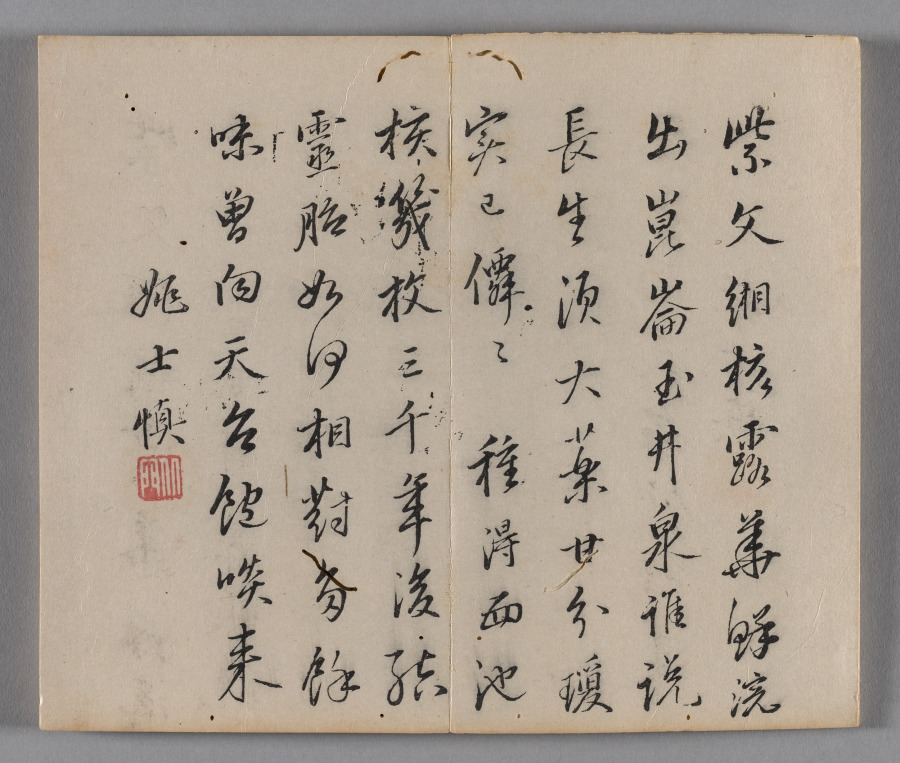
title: Ten Bamboo Studio Painting and Calligraphy Handbook (Shizhuzhai shuhua pu): Fruit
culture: China, Qing dynasty (1644-1911)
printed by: Hu Zhengyan (Chinese, c. 1584–1674)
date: 1633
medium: Woodblock-printed book; ink and colors on paper; first edition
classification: Print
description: Color printing reached a level of perfection in the early 1600s, as seen in this Ten Bamboo Studio Collection of Calligraphy and Painting and the Mustard Seed Garden Manual of Painting (printed 1679 and 1701). The painterly quality, precision in registering (aligning) the woodblocks, and harmonious colors made them the most successful color print editions in Chinese history. Both editions were printed and compiled in Nanjing, spread nationwide, and had a great impact on the arts in Japan and Korea.